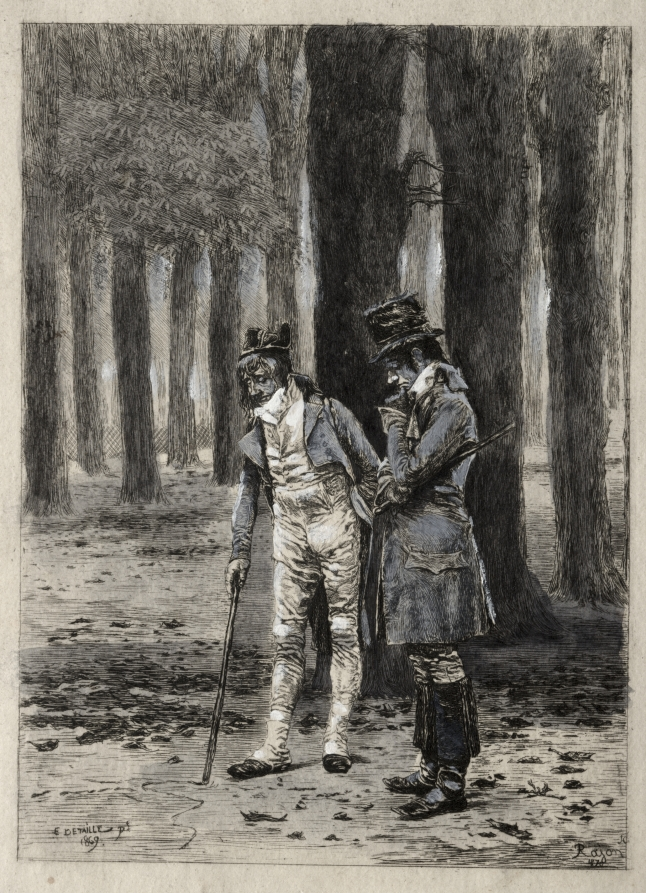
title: The Plan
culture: France, 19th century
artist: Paul Rajon (French, 1842/43–1888)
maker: after Édouard Detaille (French, 1848–1912)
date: 1870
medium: etching with white heightening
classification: Print